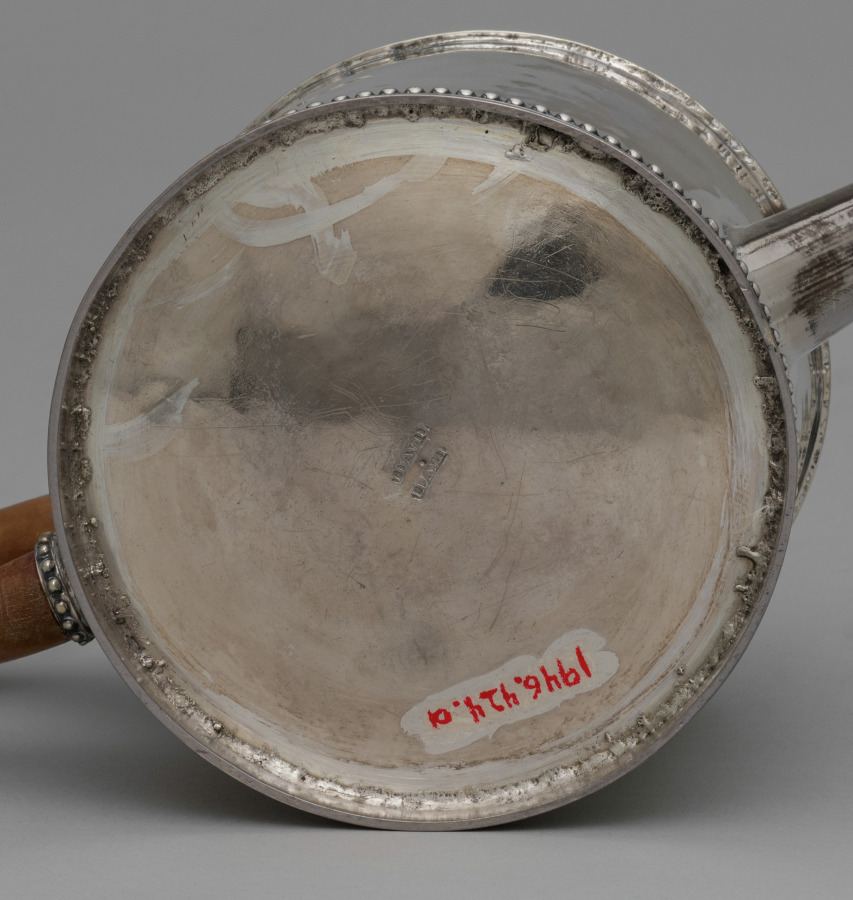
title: Teapot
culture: America, Pennsylvania, Philadelphia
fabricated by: John David (American, 1736–1793)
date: c. 1790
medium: silver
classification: Silver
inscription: engraved: "EFE" in script .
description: This teapot may have belonged to Dr. Enoch F. Edwards, George Washington’s personal physician.